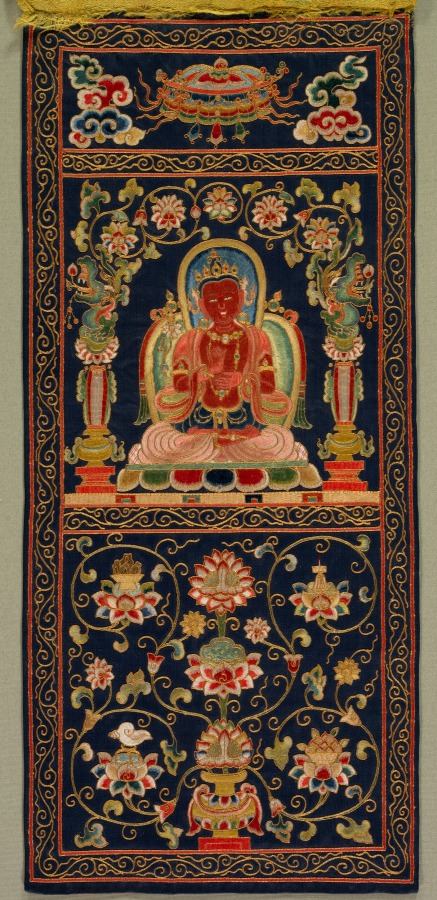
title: Thangka with the Seventh Bodhisattva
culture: China, Ming dynasty (1368–1644)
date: 1368–1424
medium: Silk and gold thread on silk satin ground, embroidery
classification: Embroidery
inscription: Penned on the reverse is a Tibetan inscription that translates as "the Seventh Bodhisattva."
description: In remarkably pristine condition, this embroidery is from a dispersed set that included images of protectors and bodhisattvas. The embroidery technique and pictorial style are Chinese, but the subject matter and the type of devotional hanging called a thangka are associated with Tibetan Buddhism. Historical records state that during the early Ming dynasty (1368–1644), gifts of Buddhist art were sent from China to Tibet, since relationships between Chinese rulers and Tibetan monastic patriarchs were strong and amicable during this time. A Tibetan inscription on the back notes that this figure is the “seventh bodhisattva,” indicating the position in which it would have hung in a temple hall. Odd-numbered works were hung on one side of the main image, and even-numbered works on the other, counting from the center.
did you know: The bodhisattva is flanked by two columns, each topped with a makara, a fanciful water creature whose tail becomes lotus scrolls forming an arch over the bodhisattva.